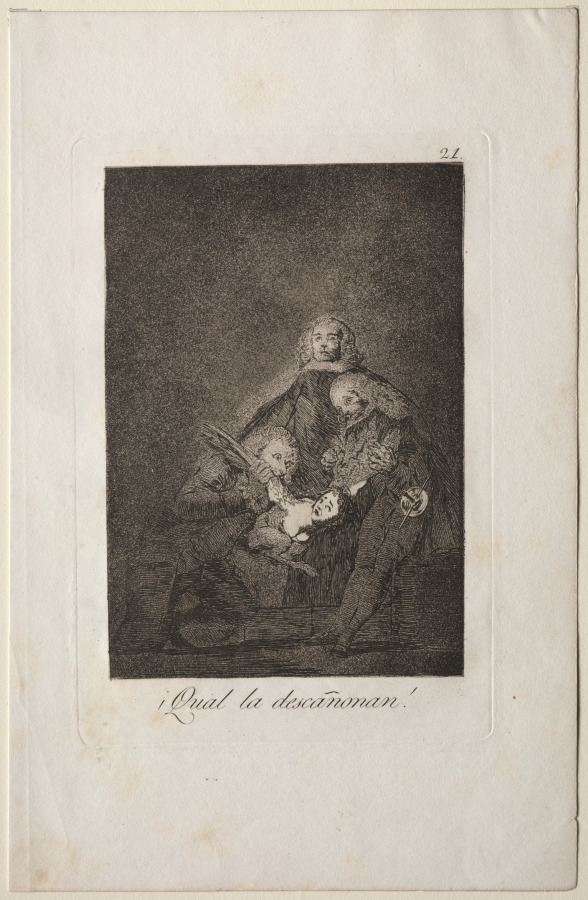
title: How They Pluck Her!, Plate 21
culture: Spain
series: Los Caprichos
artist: Francisco de Goya (Spanish, 1746–1828)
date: 1799 (printed c. 1855)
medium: etching and aquatint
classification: Print